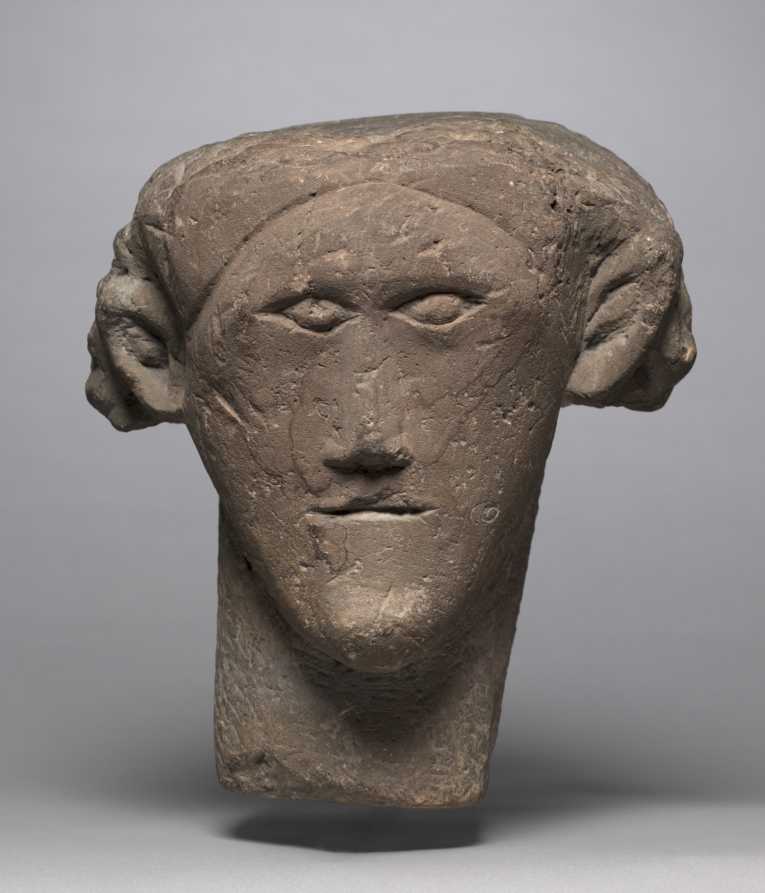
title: Celtic Head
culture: Northern England (Romano-British), Migration period, 2nd-3rd centuries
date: 100–300 CE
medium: sandstone with traces of original red paint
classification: Sculpture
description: This stone head has never been attached to a torso. It is known from ancient literary sources that the Celts, who originally occupied most of northern Europe from Hungary to the British Isles, practiced ritualistic veneration of the human head. For the Celts, the human head represented the seat of mankind’s magical energy. Stone heads similar to this one have survived in large numbers, especially in the upland regions of northern England (the Pennines, the Peak District, and Cumbria) where this one was undoubtedly made by British Celts during the Roman occupation. Such stone heads were probably placed in religious shrines or grottos generally associated with springs, well heads, or natural landmarks for ritual veneration.